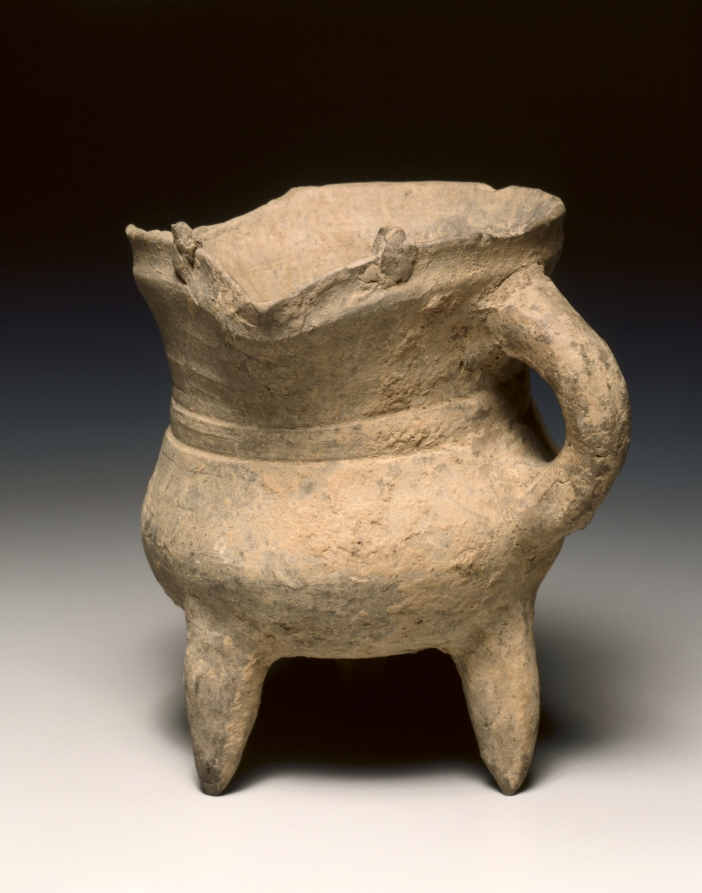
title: Wine Warmer (Jue)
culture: China, Shang dynasty (c. 1600–c. 1046 BCE), Anyang phase (c. 1250–1046 BCE)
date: c. 1300–1023 BCE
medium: pottery, tripod vessel with loop handle and rudimentary bowstring decoration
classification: Ceramic